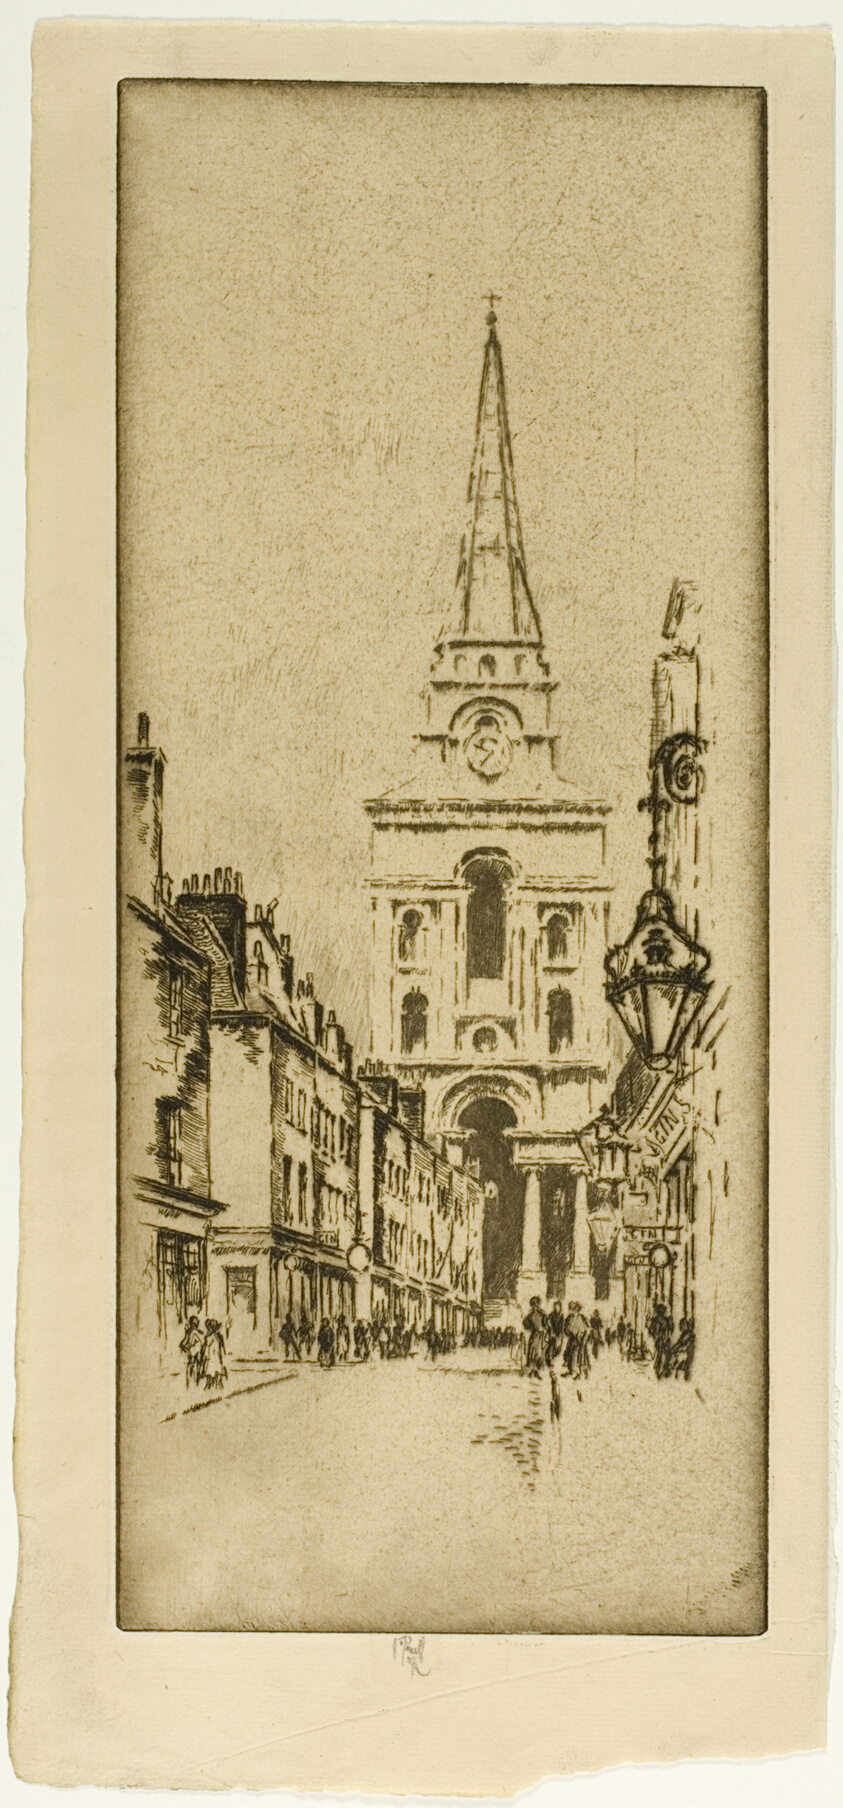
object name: Print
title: Spitalfields Church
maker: Joseph Pennell (American, 1857-1926)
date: 1906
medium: Etching on buff laid paper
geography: United States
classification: etching; print; prints and drawing